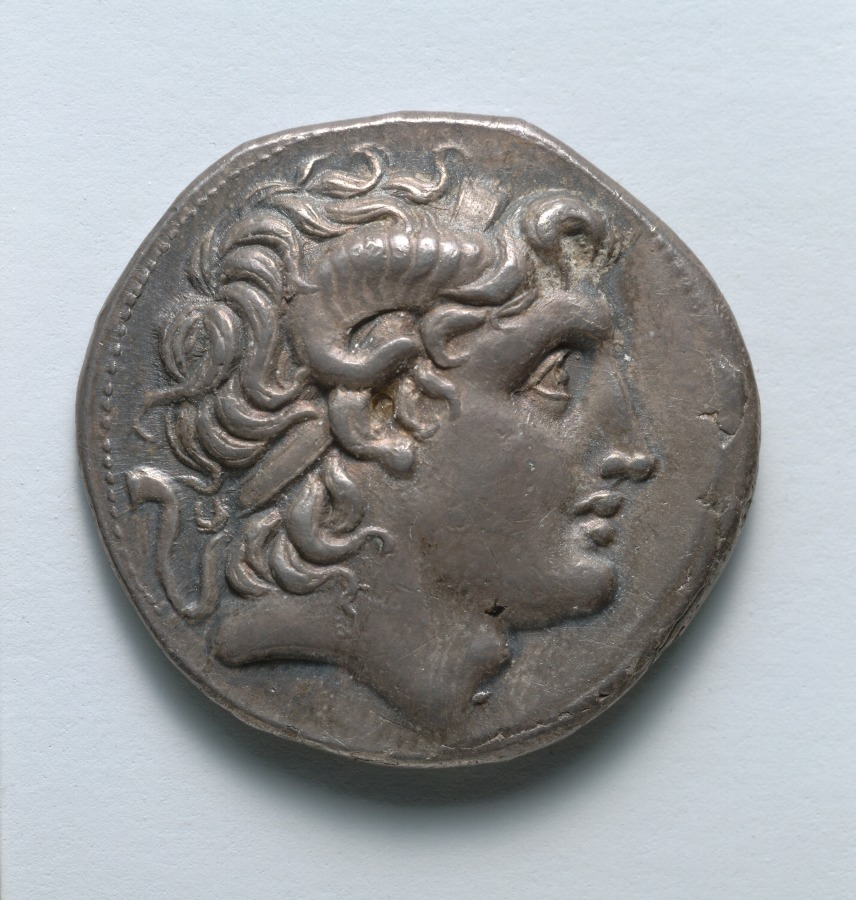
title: Tetradrachm: Head of Alexander (obverse); Athena (reverse)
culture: Greek, Macedonian, minted at Lysimachia (Thrake), reign of Lysimachos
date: 297–281 BCE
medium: silver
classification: Coins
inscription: ΒΑΣΙΛΕΩΣ | ΛΥΣΙΜΑΧΟΥ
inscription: ΑΡ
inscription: Λ within Π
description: A contemporary of Alexander the Great and one of his generals, Lysimachos used coins like this one to emphasize his connections to the fallen leader. The images of the goddesses Athena and Nike, or Victory, on the reverse, together with an inscription naming King Lysimachos, further legitimize his reign, first in Thrace and then in parts of Macedonia and Asia Minor.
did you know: Although Alexander the Great appears on this coin, the inscription on the reverse identifies its issuer as Lysimachos.